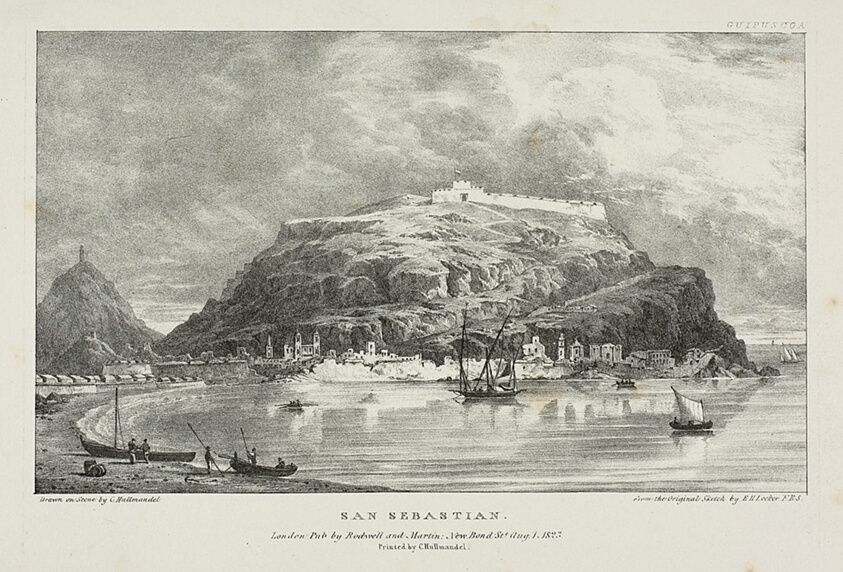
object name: Print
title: San Sebastian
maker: James Duffield Harding (English, 1797-1863); after Edward Hawke Locker (English, 1777-1849); printed by Charles J. Hullmandel (English, 1789-1850)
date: 1823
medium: Lithograph on paper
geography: England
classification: lithograph; print; prints and drawing